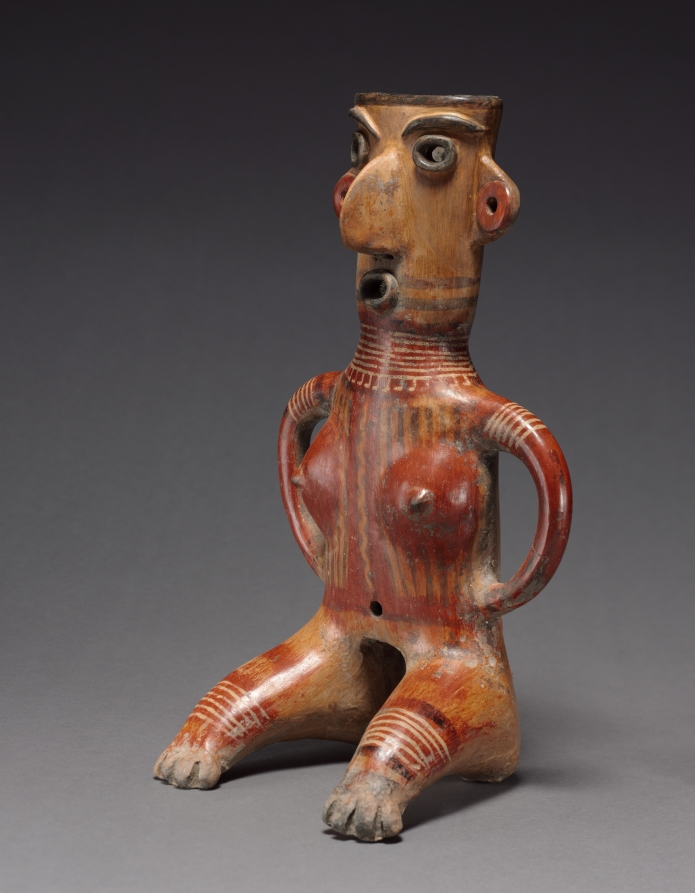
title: Seated Female Figure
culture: Mexico, Jalisco, Zacatecas style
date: 100 BCE–300 CE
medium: pottery with burnished, colored slips, resist patterning, and possibly post-fire painting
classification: Sculpture